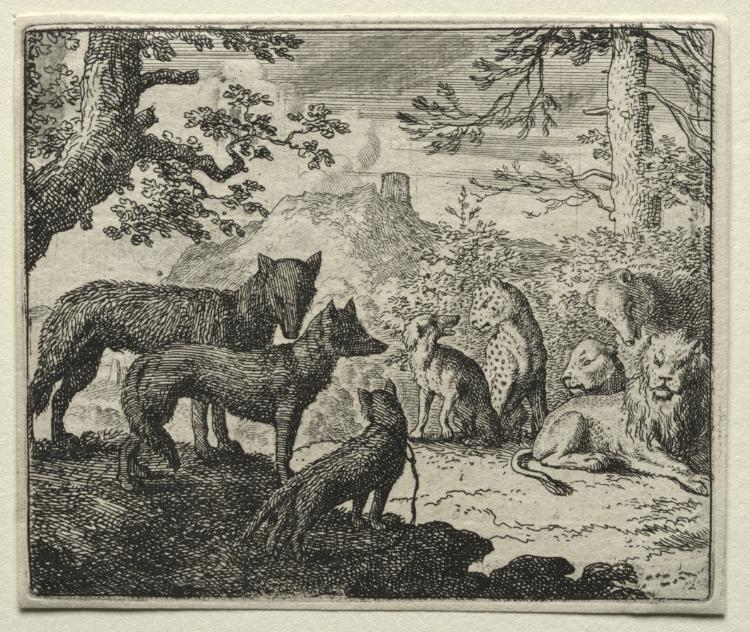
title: Reynard the Fox: The Relatives of Reynard Leave Court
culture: Netherlands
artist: Allart van Everdingen (Dutch, 1621–1675)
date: 1650–75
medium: etching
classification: Print